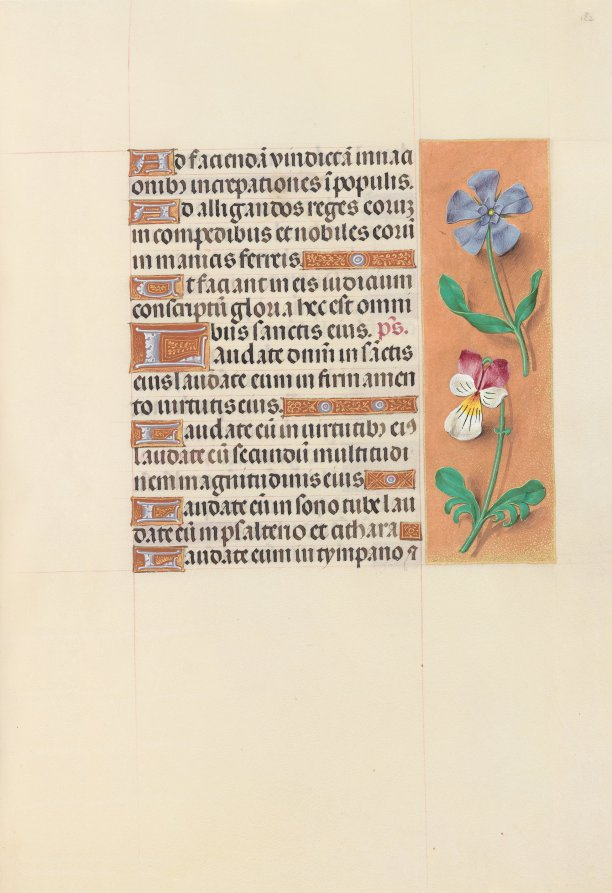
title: Hours of Queen Isabella the Catholic, Queen of Spain: Fol. 122r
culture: Flanders, Ghent and Bruges, late 15th century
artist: Master of the First Prayerbook of Maximillian (Flemish, c. 1444–1519)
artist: and Associates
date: c. 1500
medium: ink, tempera, and gold on vellum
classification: Bound Volume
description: This manuscript was illuminated by a circle of at least five highly organized manuscript painters active in the Flemish cities of Ghent and Bruges. The principal illuminator was Alexander Bening, who painted the majority of the book's miniatures. Manuscripts produced by this circle of artists are renowned for the decoration of their borders, which typically feature a rich variety of realistically-painted flowers, birds, and butterflies. This prayer book, called a book of hours, was intended not for a cleric, but for the private devotions of a lay person-in this case, Isabella the Catholic, Queen of Spain (1451-1504). Isabella's coat of arms embellishes the book's frontispiece. It is unlikely that the book was commissioned by the Queen herself; rather, she probably received it as a diplomatic gift from someone courting her patronage, perhaps Cardinal Francisco Jimenez de Cisneros. A Franciscan friar, Jimenez was dependent upon Isabella for his advancement, first to the post of Queen's confessor in 1492, and then to Archbishop of Toledo in 1495.